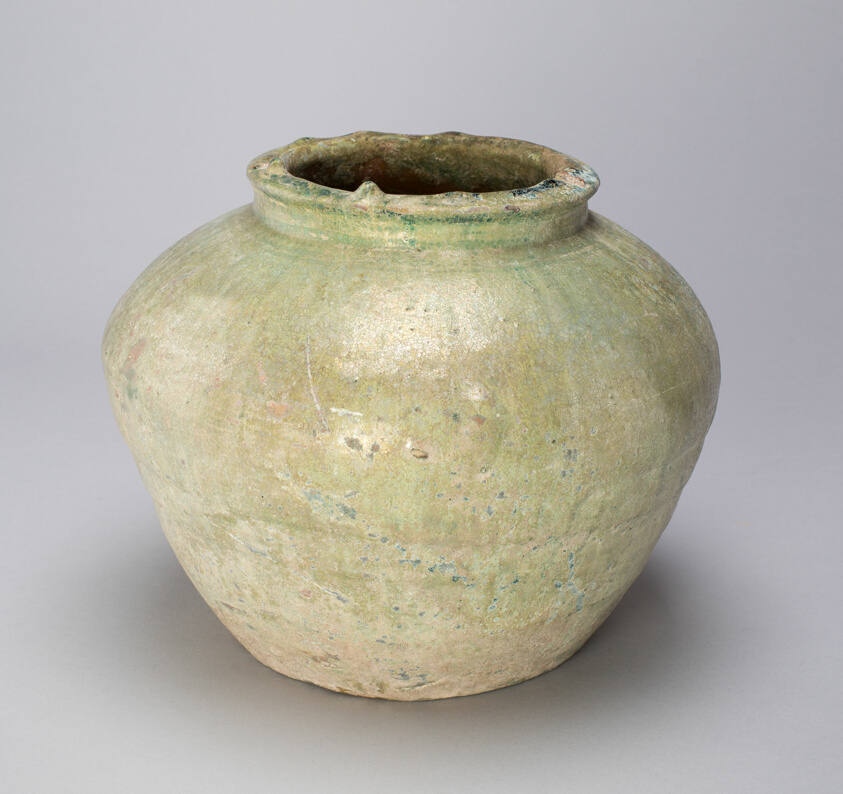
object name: Vessel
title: Jar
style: Chinese (culture or style)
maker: China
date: Eastern Han dynasty (A.D. 25–220)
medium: Earthenware with lead green glaze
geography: China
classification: ceramics; asian art; vessel